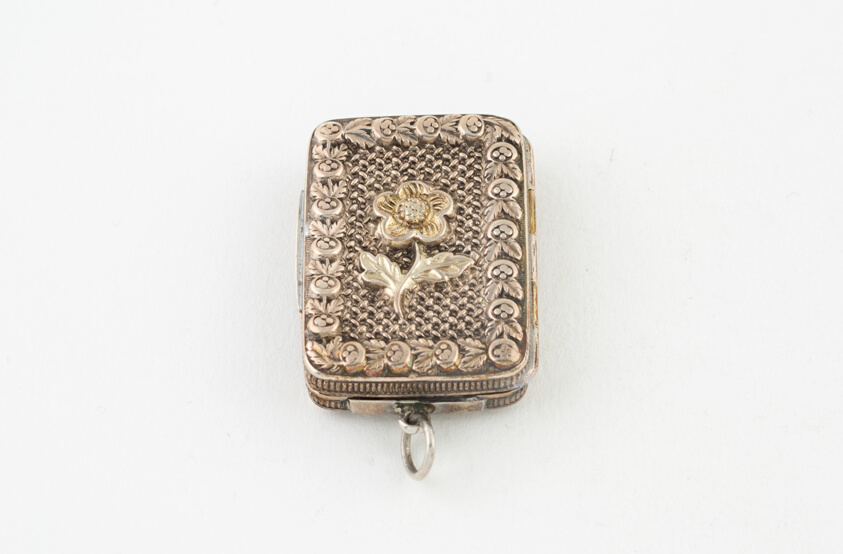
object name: Metalwork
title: Vinaigrette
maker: Possibly John Lawrence and Co.; Birmingham, England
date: c. 1822/23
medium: Silver and silver gilt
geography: Birmingham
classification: container for personal use; vinaigrette (container for health care); european decorative arts; metalwork; silver; decorative object/ornament